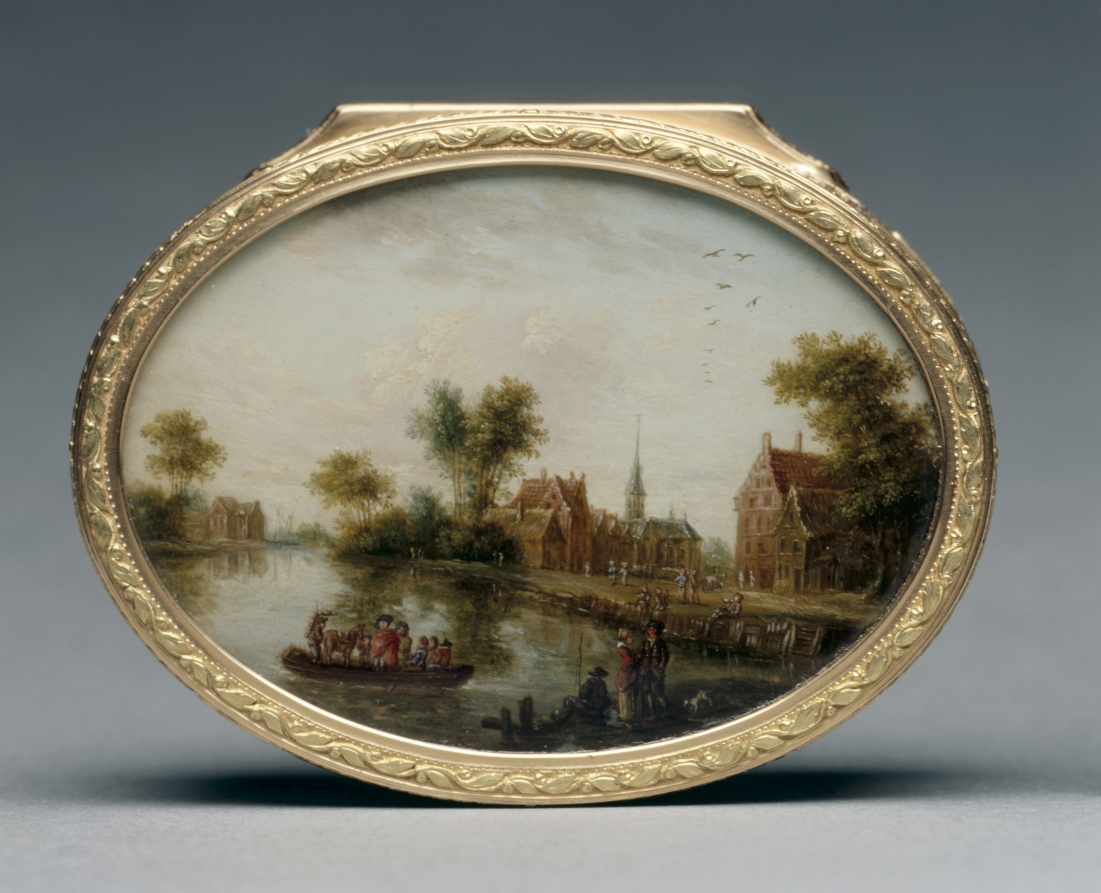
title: Snuff Box (Tabatière)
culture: France, 18th century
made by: Pierre-Nicholas Pleyard (French)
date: 1768–69; 1776–78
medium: gouache miniatures mounted on gold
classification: Metalwork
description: Snuff boxes were highly ornamented functional objects popular among French social elites. They were simultaneously containers for powdered tobacco and a means to communicate social and political status. Often decorated with miniature paintings inspired by popular paintings of the time, the works reproduced on this box are modeled after those of Claude-Joseph Vernet (cover and front panel) and David Teniers the Younger (base, side, and back panels).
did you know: These miniature paintings are mounted à cage, a practice popular in the mid-1700s that involved setting decorated panels into gold frames to create a box’s walls.